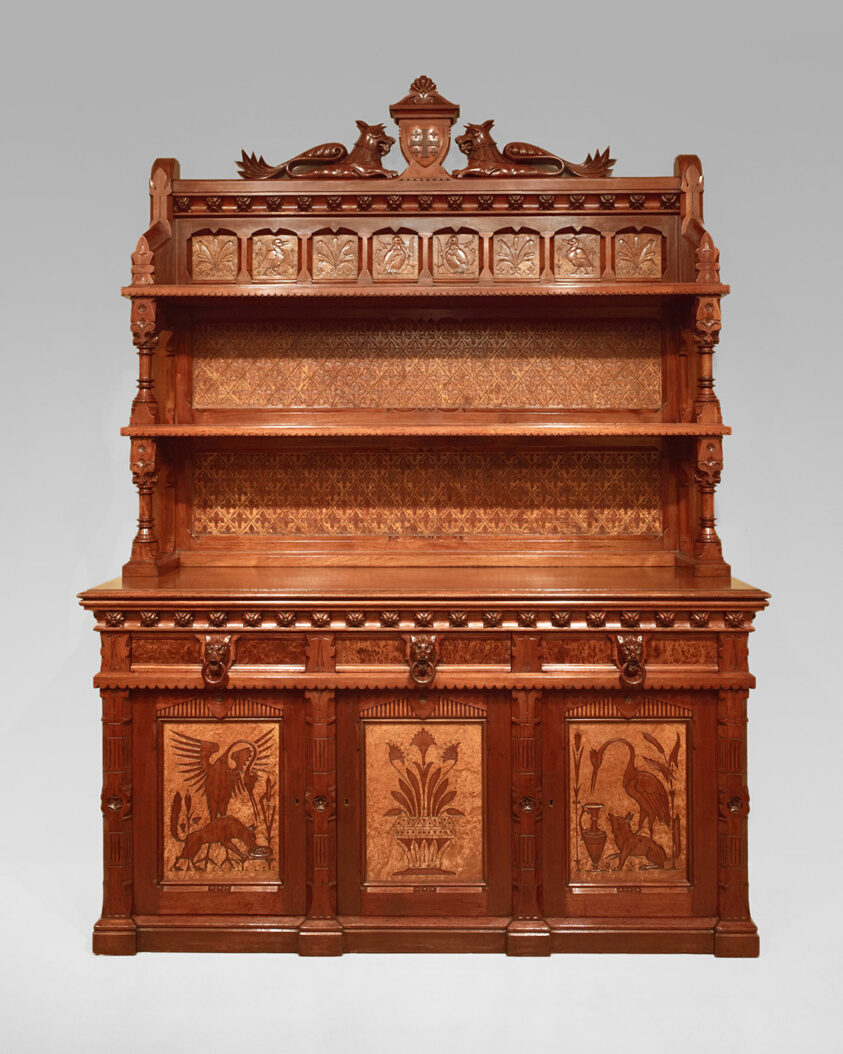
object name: Furniture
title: Sideboard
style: 19th century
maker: Daniel Pabst (American, 1826–1910); Philadelphia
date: 1868–80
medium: Walnut and burled elm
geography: Philadelphia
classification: furniture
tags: fleur de lis, birds, animals, flowers, furniture